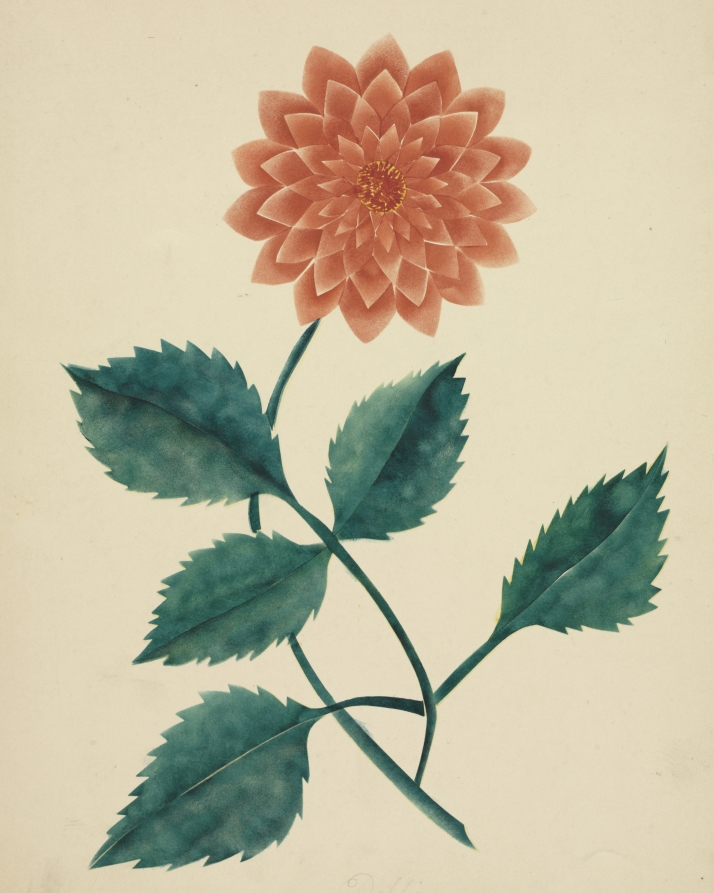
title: Dahlia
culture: America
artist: Mary Altha Nims (American, 1817–1907)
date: 1800s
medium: watercolor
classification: Drawing